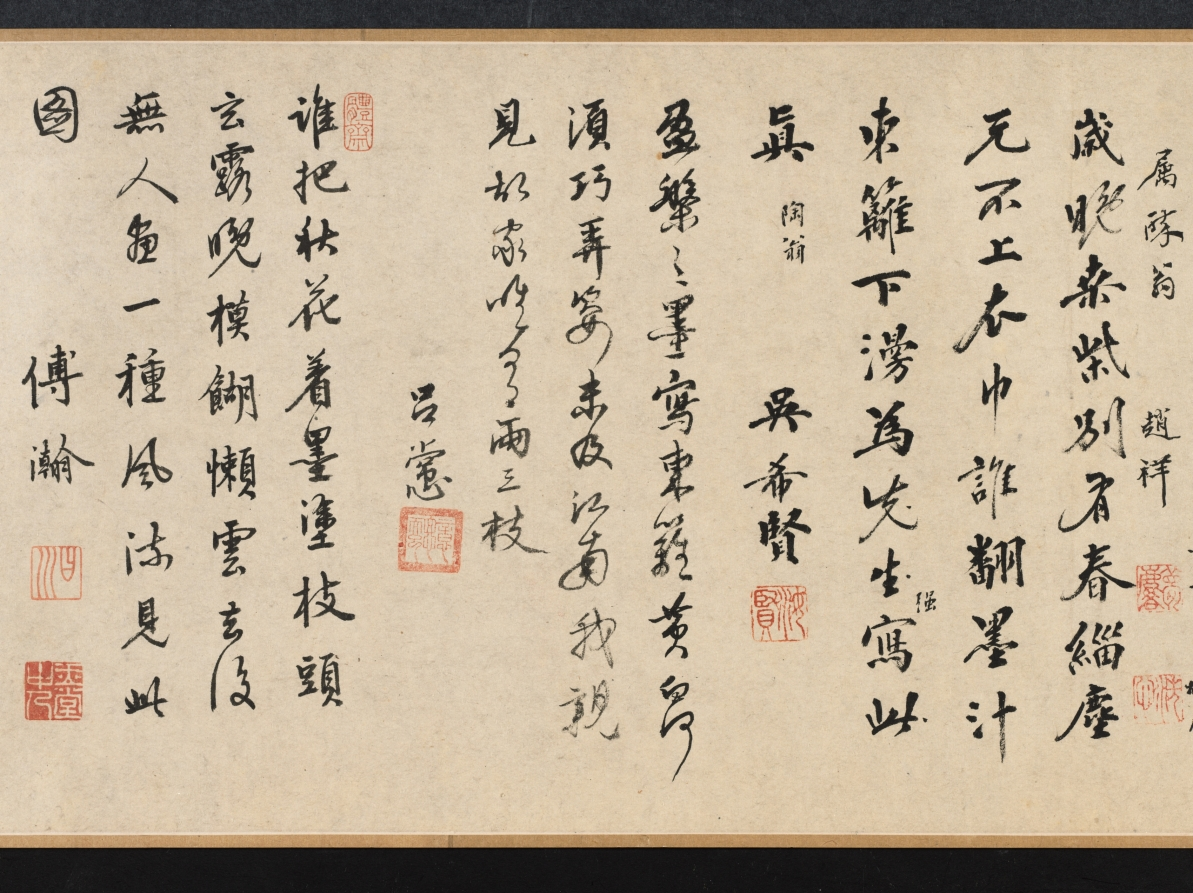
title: Chrysanthemums and Cabbage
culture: China, Ming dynasty (1368–1644)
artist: Tao Cheng (Chinese, active c. 1471–after 1502)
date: c. 1486 or before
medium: handscroll, ink and slight color on paper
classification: Painting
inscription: Artist's seal at beginning of painting: Yun hu 雲湖. Title by Wang Wenzhi 王文治 (1730–1802), date 1756. 2 seals of Wang Wenzhi 王文治 (1730-1802); 3 seals of Ku Yün (n. d.)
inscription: Section A (Chrysanthemums): 1 poem and 1 seal of Zhang Yuanzhen 張元禎 (1437–1507) - Jinshi, 1461; 1 poems and 3 seals of Ni Yue 倪岳 (1444–1501) - Jinshi, 1464; 1 poems and 2 seals of Zhao Xiang 趙祥 (life dates unknown) - Jinshi, 1469; 1 poems and 1 seals of Wu Xixian 吳希賢 (1437–1489) - Jinshi, 1464; 1 poems and 1 seals of Lü Chang 呂㦂 (1449–1511) - Juren, 1471; 1 poems and 3 seals of Fu Han 傅瀚 (1435–1502) - Jinshi, 1464; 1 poems and 1 seals of Feng Jue 馮珏 (life dates unknown) - Jinshi, 1478.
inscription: Chrysanthemums section, poem 1, by Zhang Yuanzhen 張元禎 (1437–1507): Several bushes of chrysanthemums grow in front of the Five-Willow Cottage,/ The yellow ones are really yellow and the white ones white./ This affable and decent fellow, young in years and unsophisticated,/ Has snapped one of the branches to dip in ink. (The Five-Willows Cottage was the home of the poet Tao Qian 陶潛 (Tao Yuanming 陶淵明, AD 365-427).) Chrysanthemums section, poem 2, by Ni Yue 倪岳 (1444–1501): Where at the Eastern Fence can you grieve for the Soul of the Xiang River?/ A man of upright character is mourned within the traces of ink./ White jade with a slight flaw would be a grievance forever,/ Later men should understand why even the roots of the flowers are washed. (Eastern Fence refers again to the poet Tao Qian 陶潛, while the Soul of the Hsiang River refers to the poet Qu Yuan 屈原 (c. 340–278 BC).) Chrysanthemums section, poem 3, by Zhao Xiang 趙祥 (life dates unknown): A clump of chrysanthemum grows in front of the bamboo pavilion,/ The winds of many autumns have blown since we parted beyond the river./ Straining wine through the official's cap of Tao [Qian] to prolong autumn's pleasures,/ The mists and clouds of ten thousand miles belong to the intoxicated. Chrysanthemums section, poem 4, by Wu Xixian 吳希賢 (1437–1489): It is a different spring if mulberry is planted during the latter part of the year,/ The dust of the world originally did not drop on clothing./ Who spills out ink under the Eastern Fence/ And paints so freely this portrait of chrysanthemums for the venerable Sir Tao? Chrysanthemums section, poem 5, by Lü Chang 呂㦂 (1449–1511): This full tray of ink for painting [flowers] at the Eastern Fence;/ Their whiteness or yellowness is not essential in capturing their beauty./ I don't have to go to Jiangnan to see them myself./ At my old house grow two or three branches. Chrysanthemums section, poem 6, by Fu Han 傅瀚 (1435–1502): Who daubed autumn flowers with ink/ As if they were dark dew on a branch tip only vaguely seen at evening?/ After the lazy clouds disperse, no one paints;/ A certain unconventionality pervades this painting. Chrysanthemums section, poem 7, by Feng Jue 馮珏 (life dates unknown): To satisfy his hunger, [the chrysanthemums] have at times entered the poetry of Qu Yuan;/ Taking up the wine cup, it felt close to Tao Qian./ [With them I am like] a lonely root sustained by deep water/ Or an old man to whose hair the color of youth returns.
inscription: Section B (Cabbage): 1 poem and 1 seal of Cai Qi 蔡圻 (life dates unknown) - degree information not known; 1 poems and 3 seals of Ni Yue 倪岳 (1444–1501) - Jinshi, 1464; 1 poem and 3 seals of Jiao Fang 焦芳 (1436–1517) - Jinshi, 1464; 1 poem and 3 seals of Li Dongyang 李東陽 (1447–1516) - Jinshi, 1464; 1 poems and 1 seals of Wu Xixian, signed “Xixian” 吳希賢 - Jinshi, 1464; 1 poems and 3 seals of Fu Han 傅瀚 (1435–1502) - Jinshi, 1464; 1 poems and 1 seals of Lü Chang 呂㦂 (1449–1511) - Juren, 1471; 1 poems and 2 seals of Zhao Xiang 趙祥 (life dates unknown) - Jinshi, 1469; 1 poems and 1 seals of Feng Jue 馮珏 (life dates unknown) - Jinshi, 1478.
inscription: Cabbage section, poem 1, by Cai Qi 蔡圻 (life dates unknown): The ink splashes are fresh from a frosty brush dipped in pond water;/ I can visualize that time when Yunhu 雲湖 [Tao Cheng] first showed his talents./ I lament the places where I scribbled before,/ Who would open them to inscribe a poem? (The first line is an allusion to the famous Jin dynasty calligrapher Wang Xizhi 王羲之 (AD 303-361), who practiced calligraphy so diligently at the edge of a pond that the water turned black with ink.) Cabbage section, poem 2, by Ni Yue 倪岳 (1444–1501): After rain the vegetables begin to grow;/ How are the colors of the masses lately!/ Once you get used to them, the tastiest parts are the ends of the roots;/ I don't know if they can be used for "seasoning soup." ("Seasoning soup" is an allusion to the statesmanship of a chief minister.) Cabbage section, poem 3, by Jiao Fang 焦芳 (1436–1517): This crop of purple stalks and green leaves is late and irregular;/ Now the rainy season is over for the Eastern Garden./ All the nobles nowadays dine on meat;/ Who of them knows the flavor of this [cabbage]. Cabbage section, poem 4, by Li Dongyang 李東陽 (1447–1516): It's always helped the honest man to sober up after drinks./ I intend to go to the deepest part of the stream-crossed garden/ To refresh myself in the fragrance and dew of evening. Cabbage section, poem 5, by Wu Xixian 吳希賢 (1437–1489): After rain, the white silk is filled with fragrant vegetables;/ How many times this happens in Mr. Tao's paintings./ On whom will you depend to present a memorial to the ruler?/ Don't let this color emerge on the faces of the people. (The last line is meant as a warning to officials: the color of the vegetables (green) may be pleasing in itself, but when it emerges on the faces of the starving poor, it signifies a badly governed world.) Cabbage section, poem 6, by Fu Han 傅瀚 (1435–1502): For twenty years I have feasted on the excellent mutton of an official;/ Yet I talk and dream about the garden and its vegetables./ Do not merely say it is good to chew the root of the cabbage--/ You must taste to understand what poverty is. Cabbage section, poem 7, by Lu Chang 呂㦂 (1449–1511): The capital is never a place for an apprentice in the "garden of scholarship."/ Who would write about gardens and vegetables on an examination paper?/ I've walked throughout the country in spring;/ Make sure the people don't show this color. Cabbage section, poem 8, by Zhao Xiang 趙祥 (life dates unknown): After a wash of rain, the spring garden is still in order;/ The flavor [of the cabbage] is more suitable with a small drink and the hum of a tune./ The rich and powerful in their mansions consume dish after dish of meat;/ Vegetarian food is known only by the scholars. Cabbage section, poem 9, by Feng Jue 馮珏 (life dates unknown): A new cabbage is nourished with dew;/ It takes a long time to grow and mature./ The business of "seasoning the soup" is your responsibility;/ Better command the gardener to take care [of the cabbages]. trans. HK/LYSL/WKH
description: On an autumn day in Beijing, Tao Cheng had a gathering with a group of scholar-officials and created two paintings in a spontaneous, casual style. The first depicts chrysanthemums, slender bamboo stalks, and a rock in monochrome ink. Tao applied light colors for the second painting that depicts cabbage. Tao deliberately placed the images on the first sections of the paper so that his honorable guests could add their poetic inscriptions inspired by his imagery. In the first section to the right, all seven poetic inscriptions refer to the beloved poet and recluse Tao Qian (also called Tao Yuanming, AD 365–427) who was particularly known for his profound love for chrysanthemum flowers. Most of the inscriptions in the second section express sympathy for the poor, since cabbage is the main ingredient in their humble food. Taken together, the poems and paintings allude to the life and responsibilities of the scholar-official: the importance of both an upright character and a concern for the poor citizens in order to achieve good government.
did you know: Eminent calligrapher Wang Wenzhi 王文治 was only 27 sui when he wrote the title in 1756.